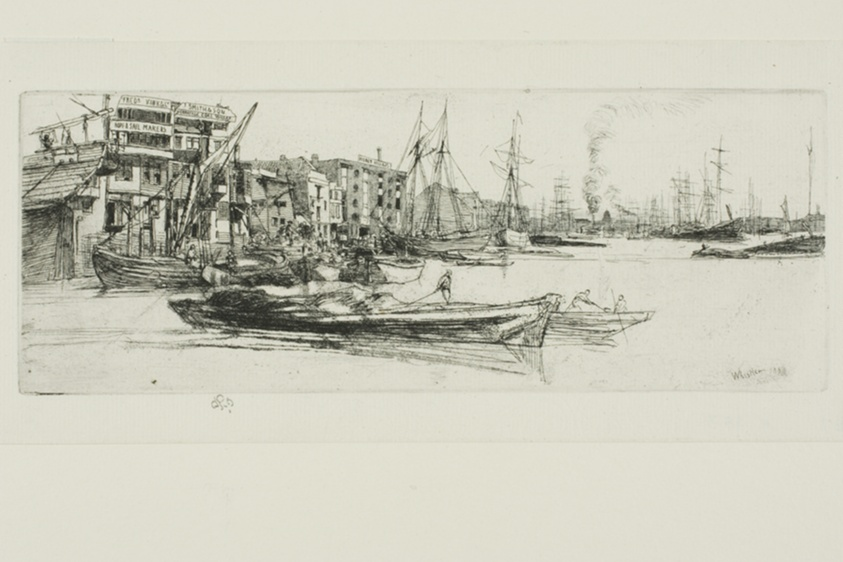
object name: Print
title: Thames Warehouses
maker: James McNeill Whistler (American, 1834-1903)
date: 1859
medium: Etching and drypoint with foul biting in black ink on ivory laid paper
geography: United States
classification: etching; foul biting; print; prints and drawing; paper; drypoint